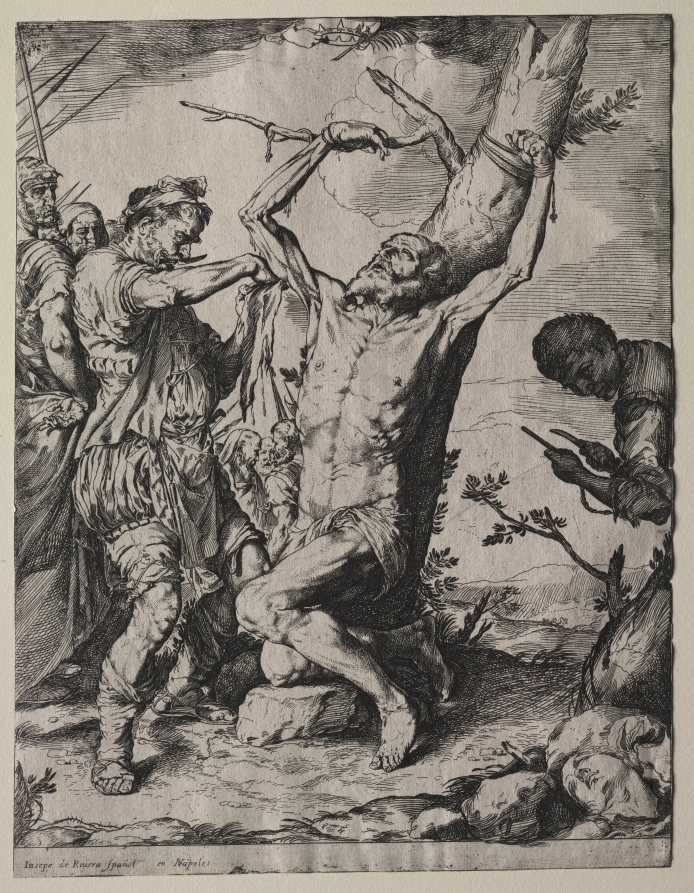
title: Martyrdom of St. Bartholomew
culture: Spain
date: 1600s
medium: etching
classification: Print